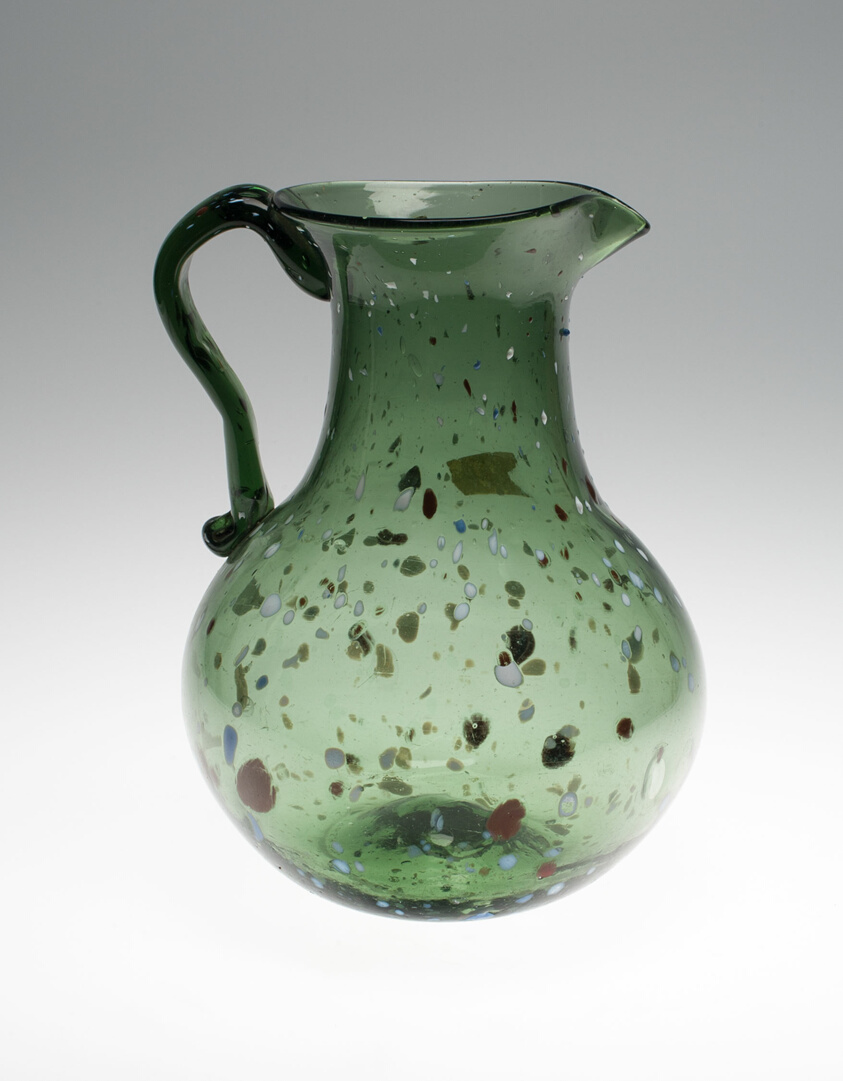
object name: Glass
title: Pitcher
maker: England or France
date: Early 19th century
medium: Glass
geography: England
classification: pitcher (vessel); glass; vessel; european decorative arts